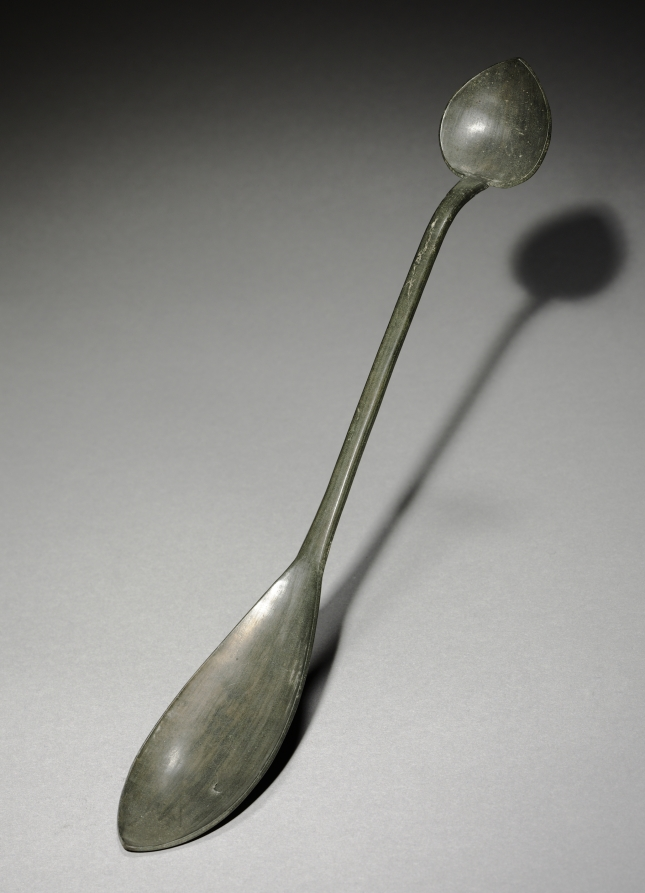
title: Spoon with Dual Heads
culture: Korea, Goryeo dynasty (918–1392)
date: 918–1392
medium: silver bronze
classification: Metalwork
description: This bronze spoon has dual heads: one is large, and the other small. The smaller head is believed to have been used to hold a small dose of liquid medicine.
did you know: Bronze spoons are the most common burial item. Scholars have proposed that toward the end of the 14th century, Koreans enjoyed meat-based soups more than any other dishes, explaining why spoons became common household items as well as burial goods.